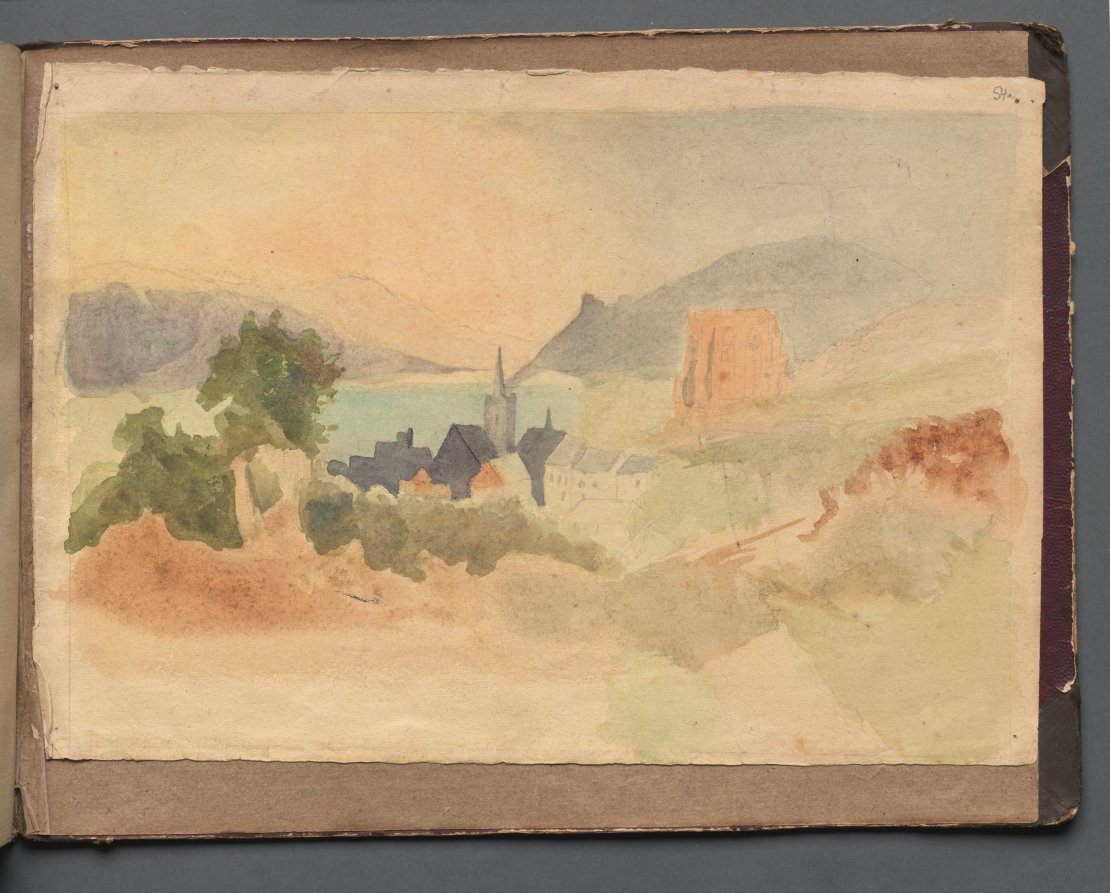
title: Album with Views of Rome and Surroundings, Landscape Studies, page 54a: Roman Landscape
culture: Germany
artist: Franz Johann Heinrich Nadorp (German, 1794–1876)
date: c. 1830s-70s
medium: watercolor with graphite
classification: Bound Volume